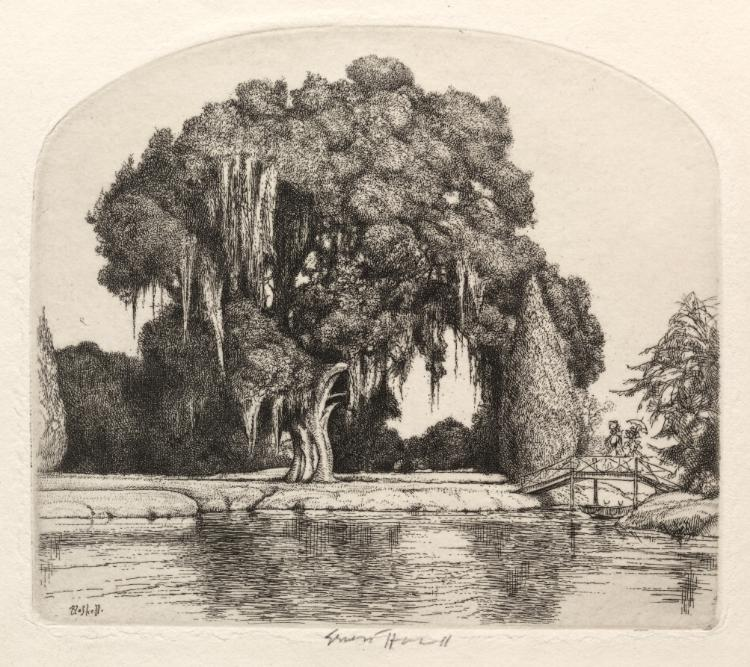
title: When Duels Were Fought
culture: America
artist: Ernest Haskell (American, 1876–1925)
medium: etching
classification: Print